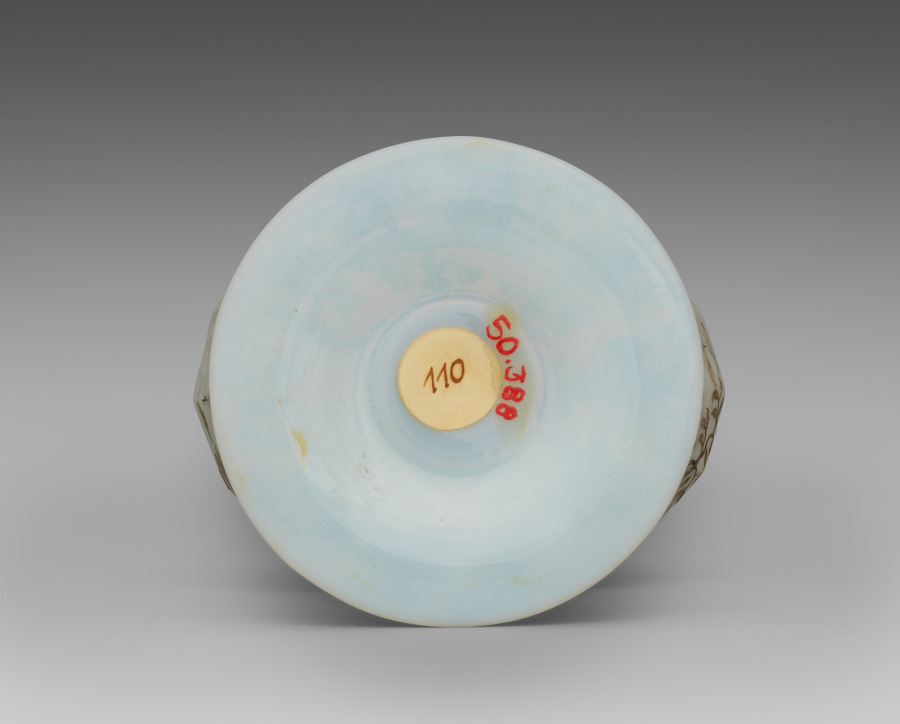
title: Cup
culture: Bohemia, 18th century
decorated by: Ignaz Preissler (Bohemian, 1676–1741)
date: c. 1735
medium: Opal glass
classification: Glass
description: This cup may have functioned as a vessel for an alcoholic beverage or as a container for food such as candies or pastries. Ignaz Preissler’s specialty was a technique known as Schwarzlot (“black lead” in German), in which a design was painted with black enamel and then fine details were scratched out with a needle. Preissler’s clients were primarily aristocrats who commissioned vessels as gifts or commemorative items and for whom the chinoiseriedecoration (imaginary European interpretations of Asian cultures), seen here, was fashionable.